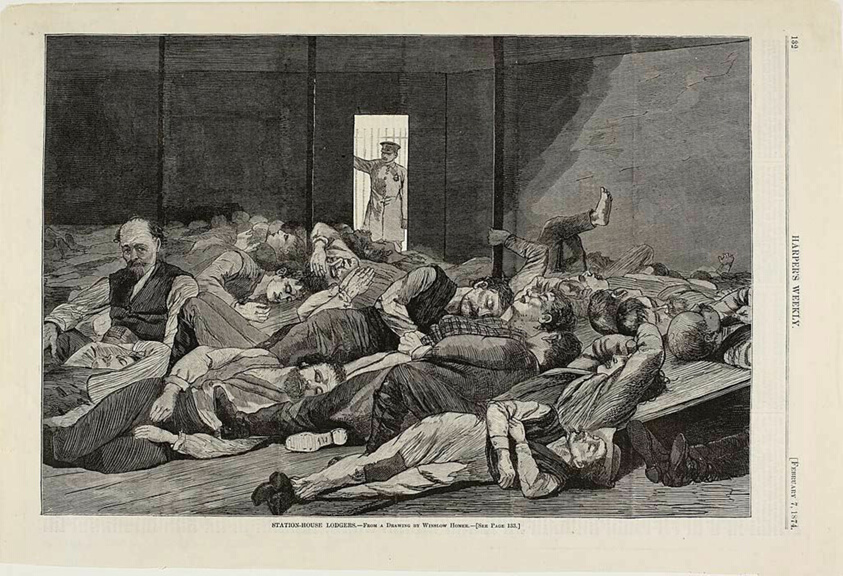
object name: Print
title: Station House Lodgers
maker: Winslow Homer (American, 1836-1910); published by Harper's Weekly (American, 1857-1916)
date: published February 7, 1874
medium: Wood engraving on paper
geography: United States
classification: wood engraving; print; prints and drawing